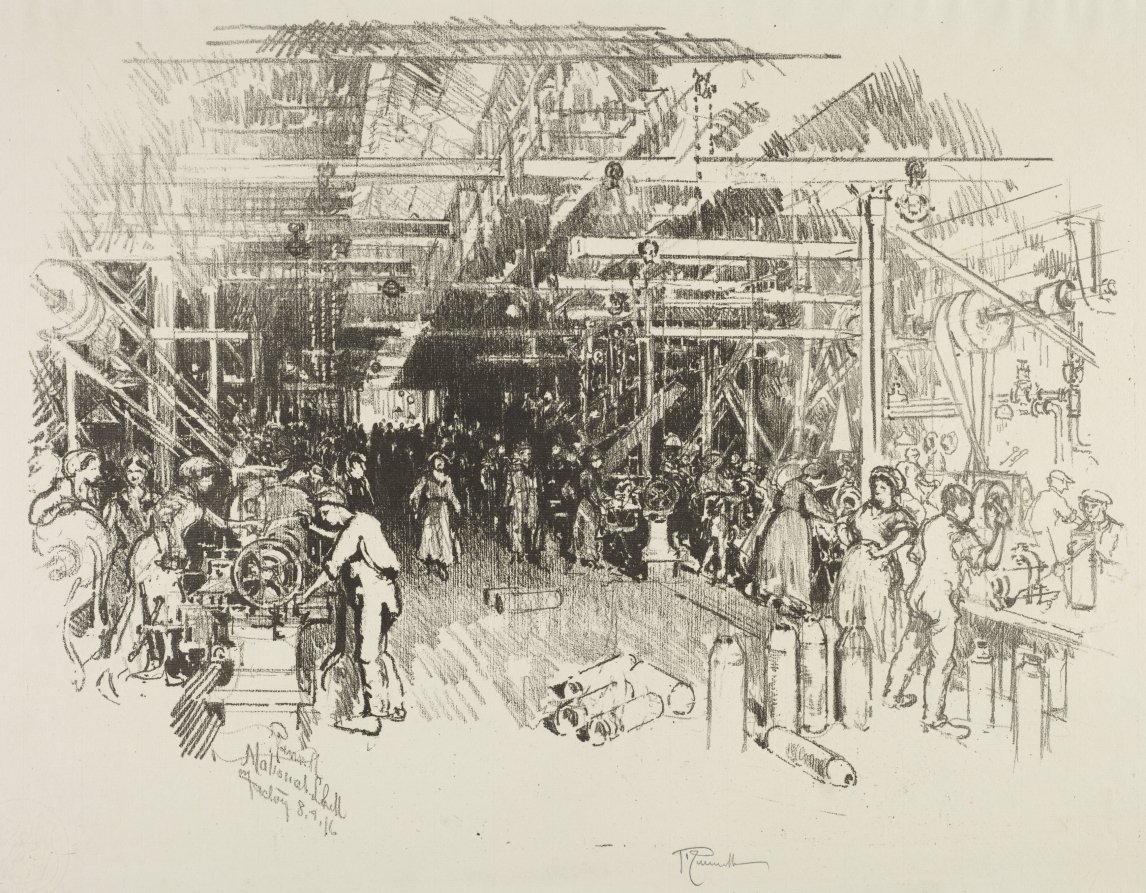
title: English War Work: The Shell Factory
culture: America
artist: Joseph Pennell (American, 1857–1926)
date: 1916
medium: lithograph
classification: Print